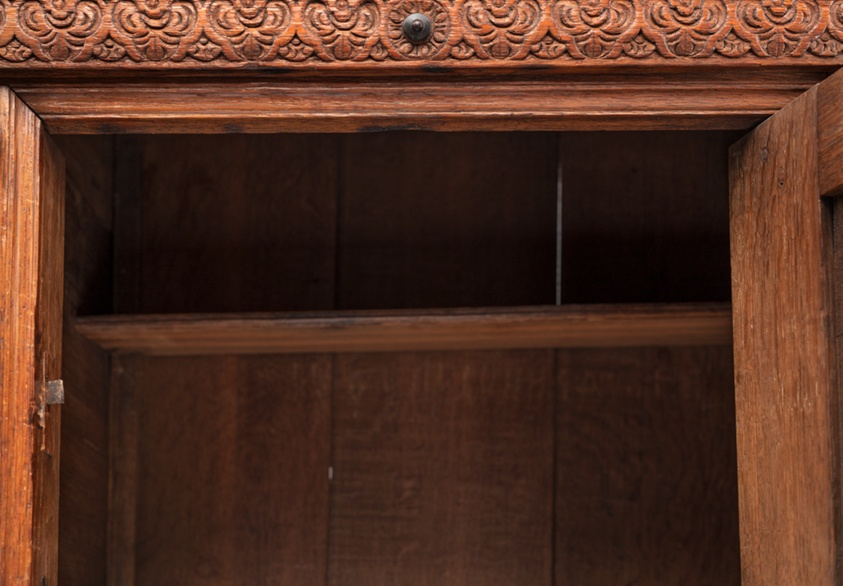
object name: Furniture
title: Linen Cupboard (Kast)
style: Baroque, Mannerism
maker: The Netherlands, probably Amsterdam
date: 1630/50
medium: Oak, pearwood, hardwood, paint, iron, and brass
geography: Netherlands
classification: furniture; decorative arts; functional object; furnishings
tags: lions, animals, architecture